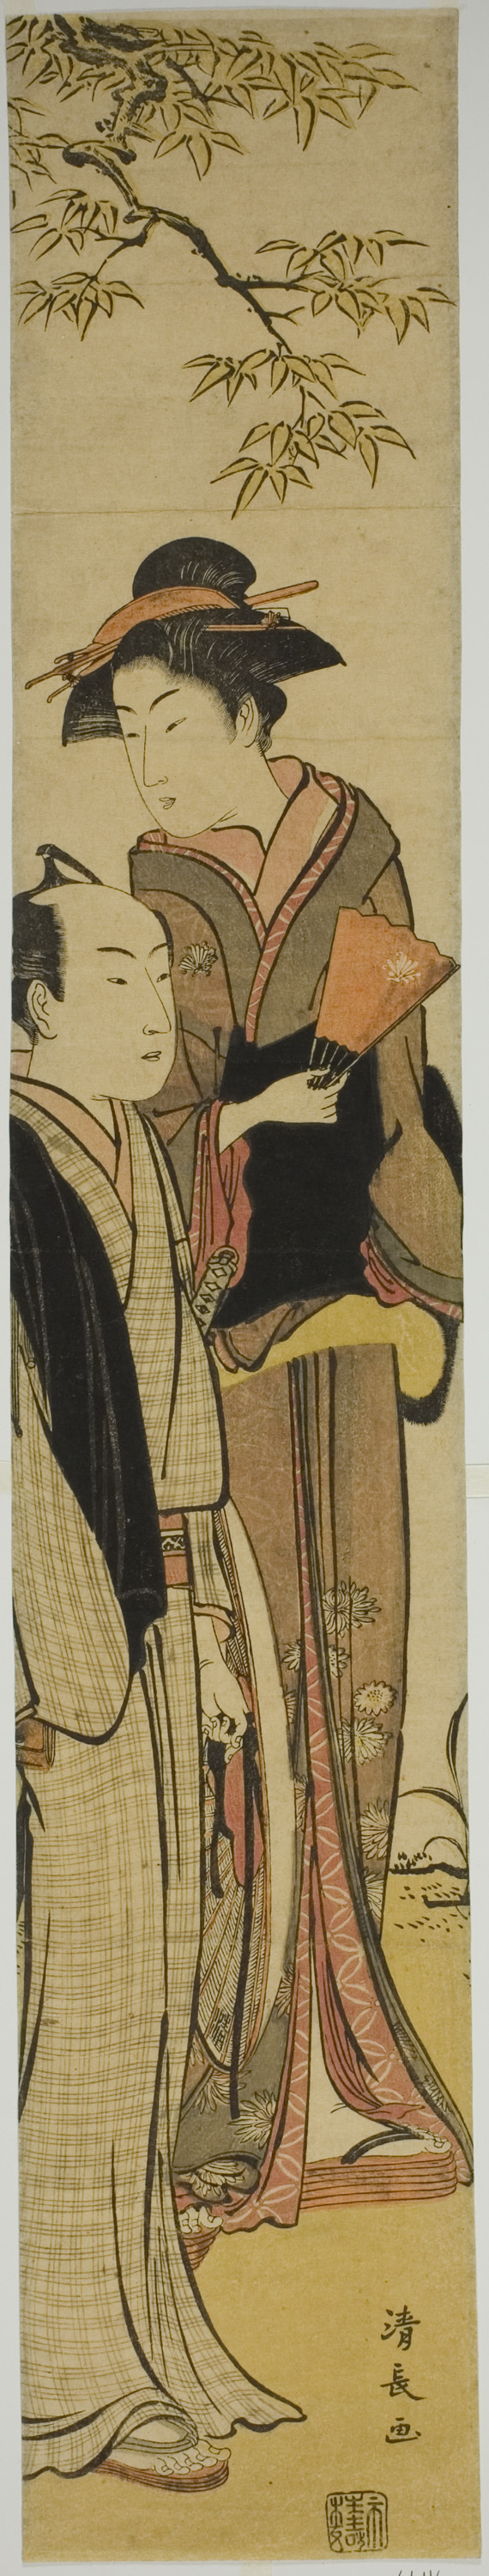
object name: Print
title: Couple Under a Tree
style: Japanese (culture or style)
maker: Torii Kiyonaga (Japanese, 1752-1815)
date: c. 1781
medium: Color woodblock print; hashira-e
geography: Japan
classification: woodblock print; print; asian art